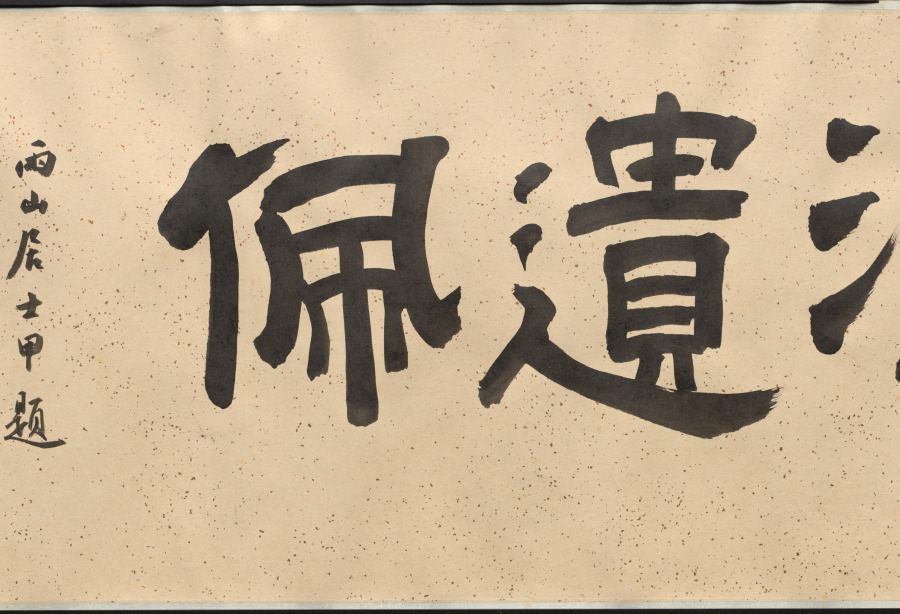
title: Rocks, Orchid, and Bamboo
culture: China, Qing dynasty (1644-1911)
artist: Shitao (Chinese, 1642–1707)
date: 1662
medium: handscroll; ink on paper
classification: Painting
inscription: Title colophon in four characters with signature and two seals on gold-flecked paper.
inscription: Artist's signature, inscription (with date of 1662), five seals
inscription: Colophon with two seals.